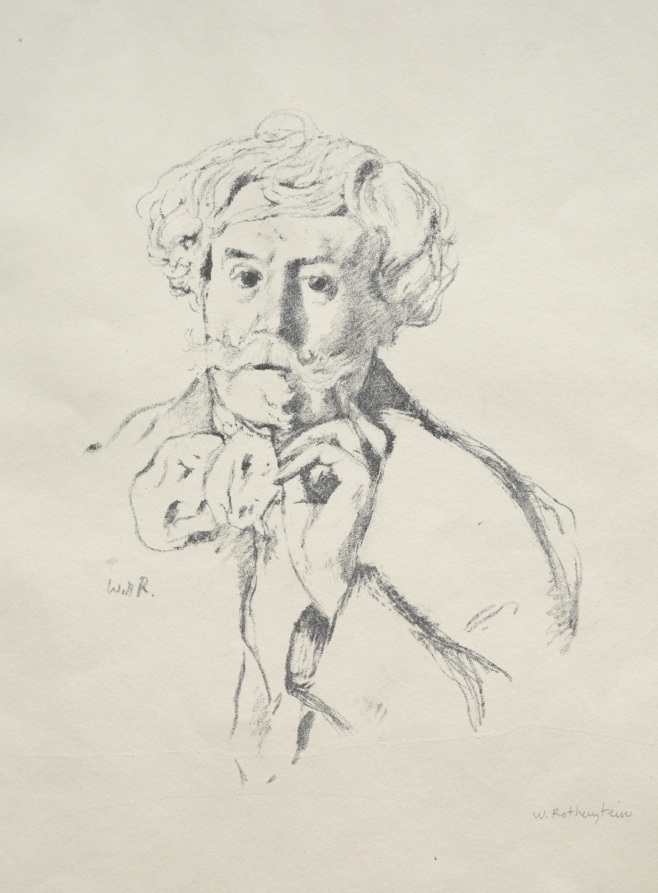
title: Edmond de Goncourt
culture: England, 20th century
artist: William Rothenstein (British, 1872–1945)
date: 1897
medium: lithograph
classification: Print